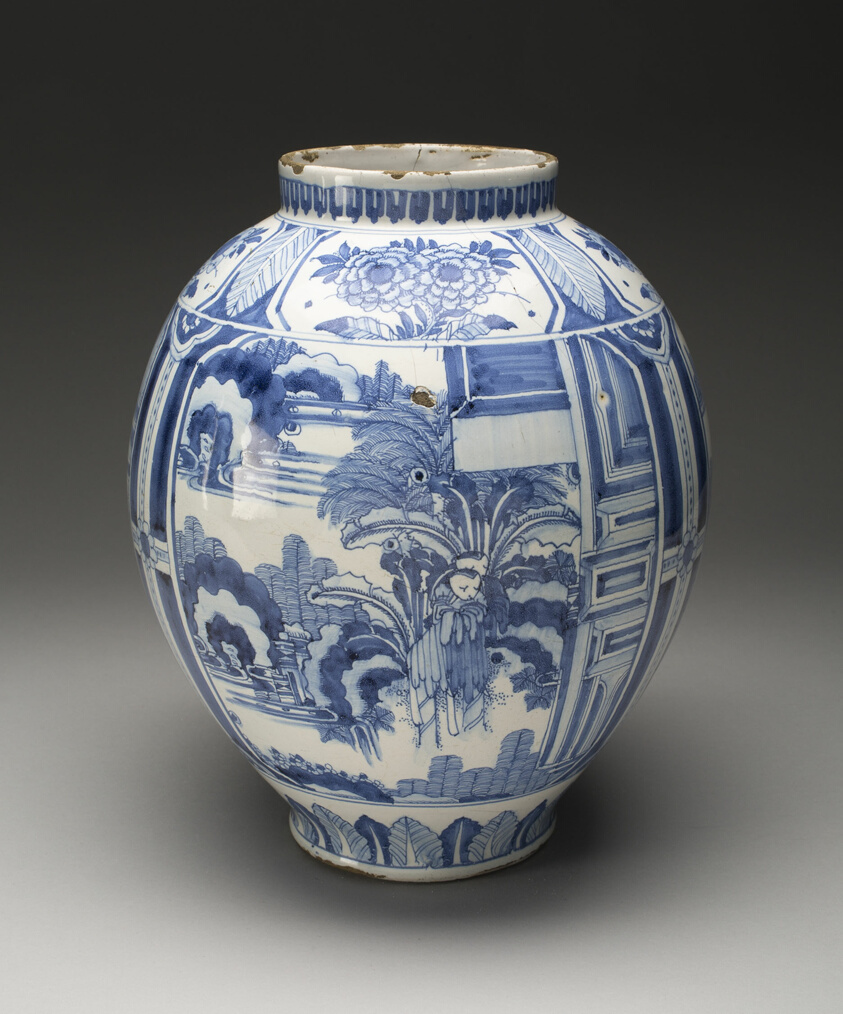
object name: Ceramics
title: Vase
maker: Delft, Netherlands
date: c. 1660–80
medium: Tin-glazed earthenware (Delftware)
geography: Delft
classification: vase; earthenware; vessel; european decorative arts; faïence; ceramics